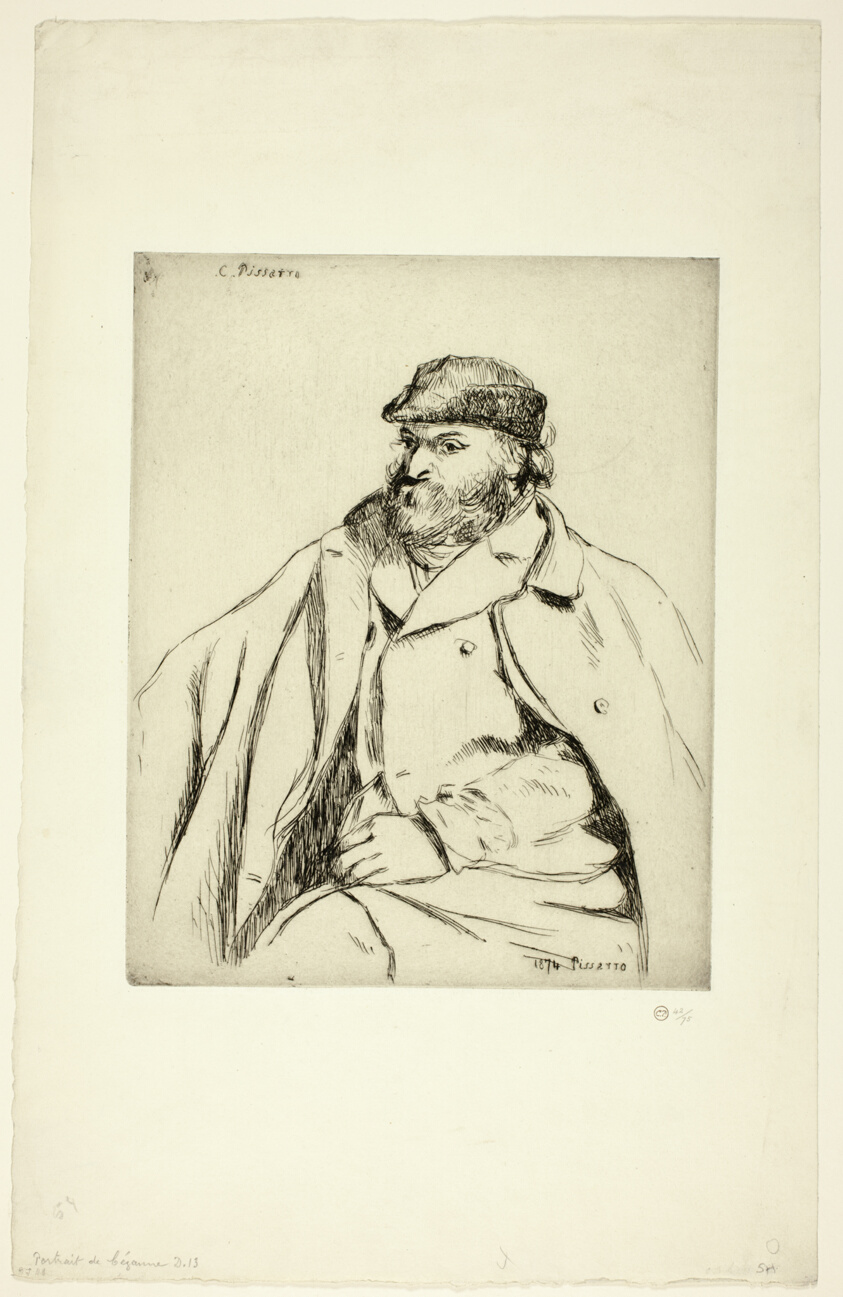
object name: Print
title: Paul Cézanne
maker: Camille Pissarro (French, 1830-1903)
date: 1874, printed 1920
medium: Etching in black on ivory laid paper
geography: France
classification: etching; print; prints and drawing